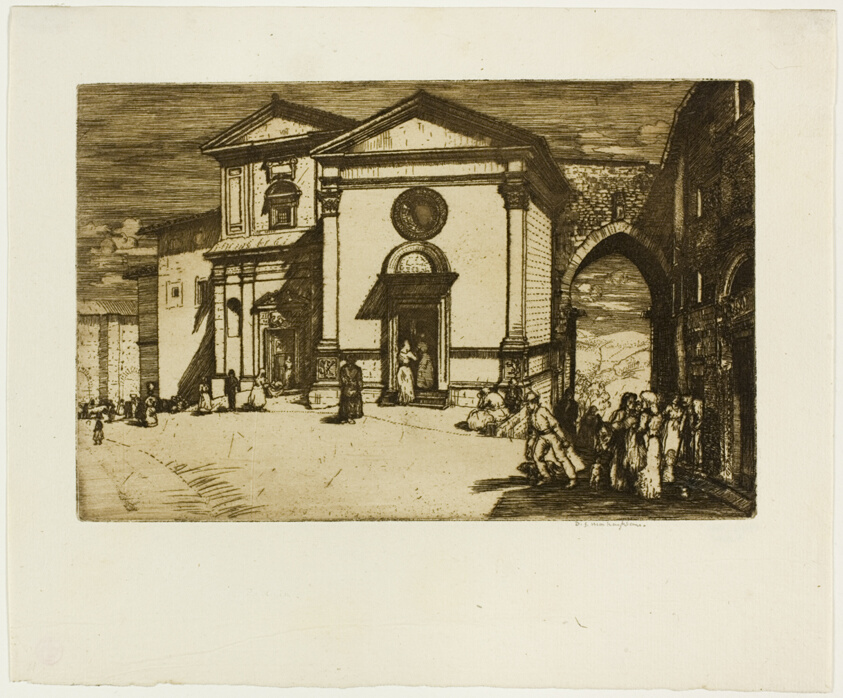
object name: Print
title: Perugia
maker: Donald Shaw MacLaughlan (American, born Canada, 1876-1938)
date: 1905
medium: Etching in sepia on cream laid paper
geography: United States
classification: etching; print; prints and drawing